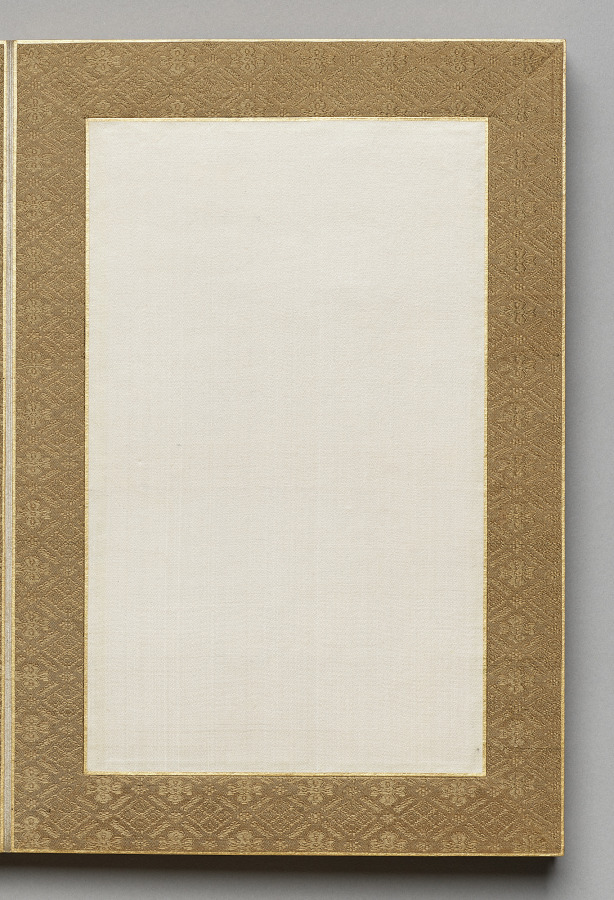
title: Painting from Flowers and Grasses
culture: Japan, Edo period (1615–1868)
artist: Tsubaki Chinzan (Japanese, 1801–1854)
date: 1841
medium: album; ink and color on silk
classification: Painting